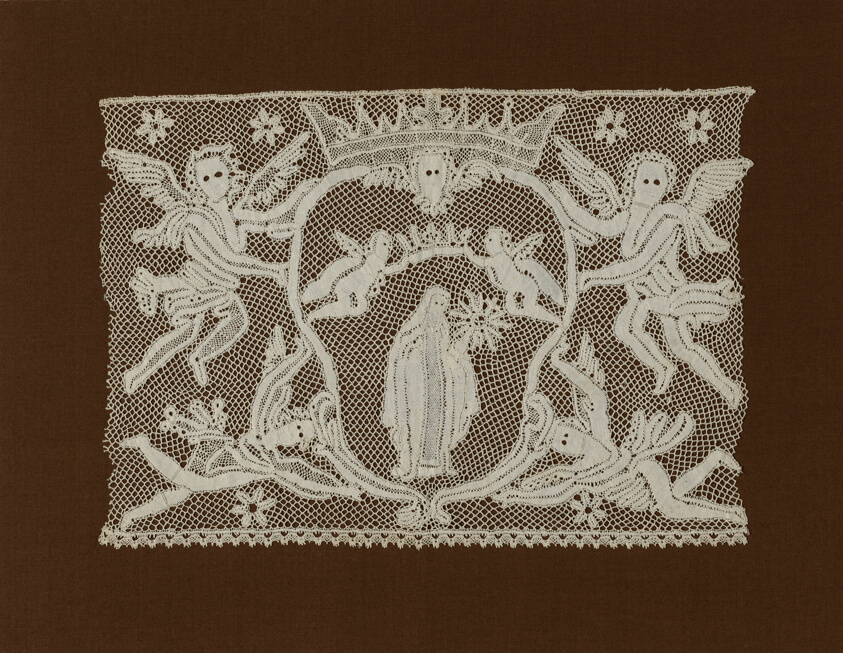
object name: Textile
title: Fragment (Flounce depicting Mary, Queen of Heaven)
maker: Italy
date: 1725/75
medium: Linen, bobbin part lace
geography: Italy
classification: textile; lace - bobbin